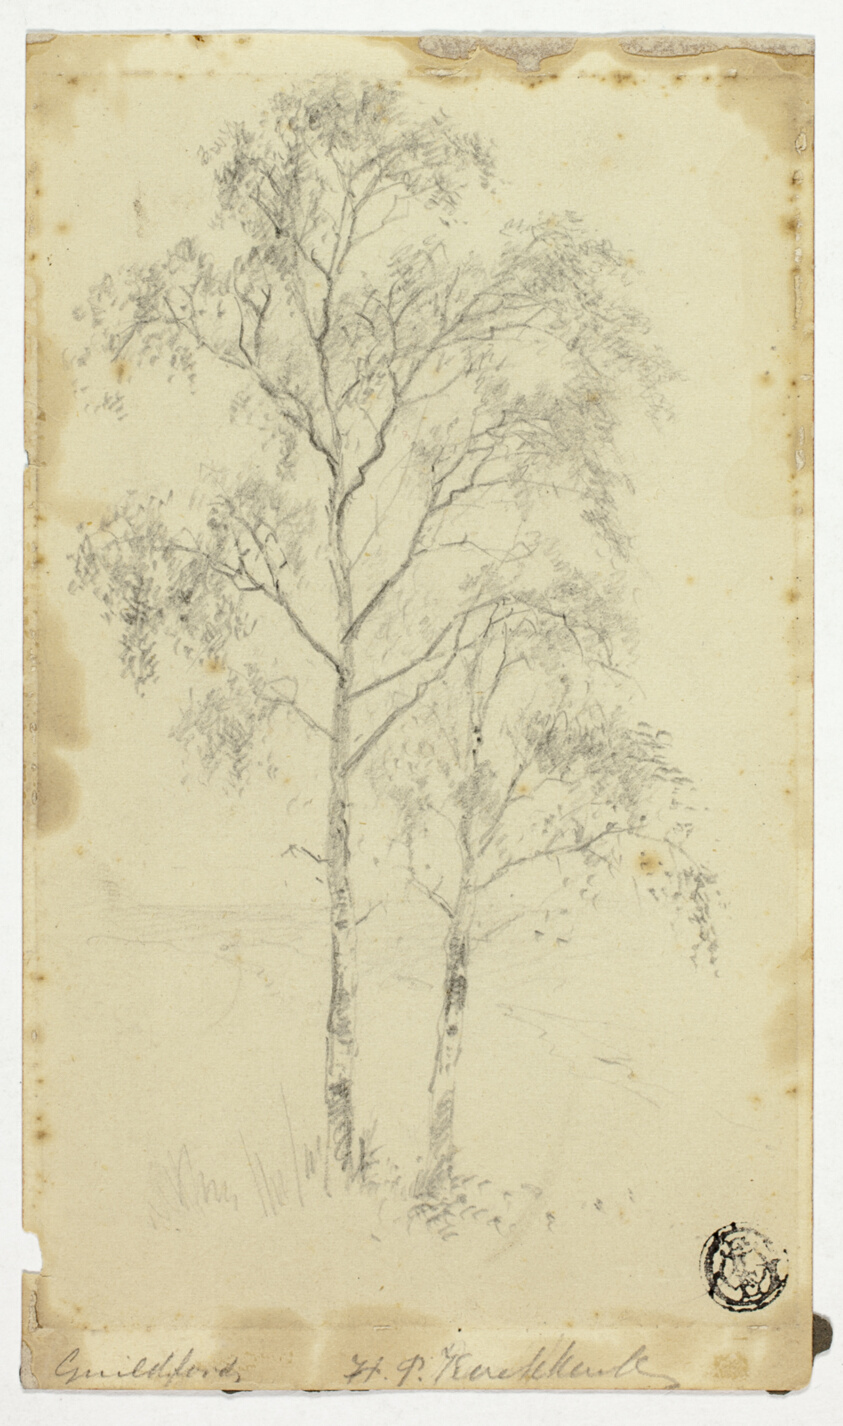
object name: Drawing and Watercolor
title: Guildford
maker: Hendrik Pieter Koekkoek (Dutch, 1843-c. 1890)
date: c. 1877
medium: Graphite on cream wove paper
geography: Holland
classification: graphite; drawings (visual works); prints and drawing